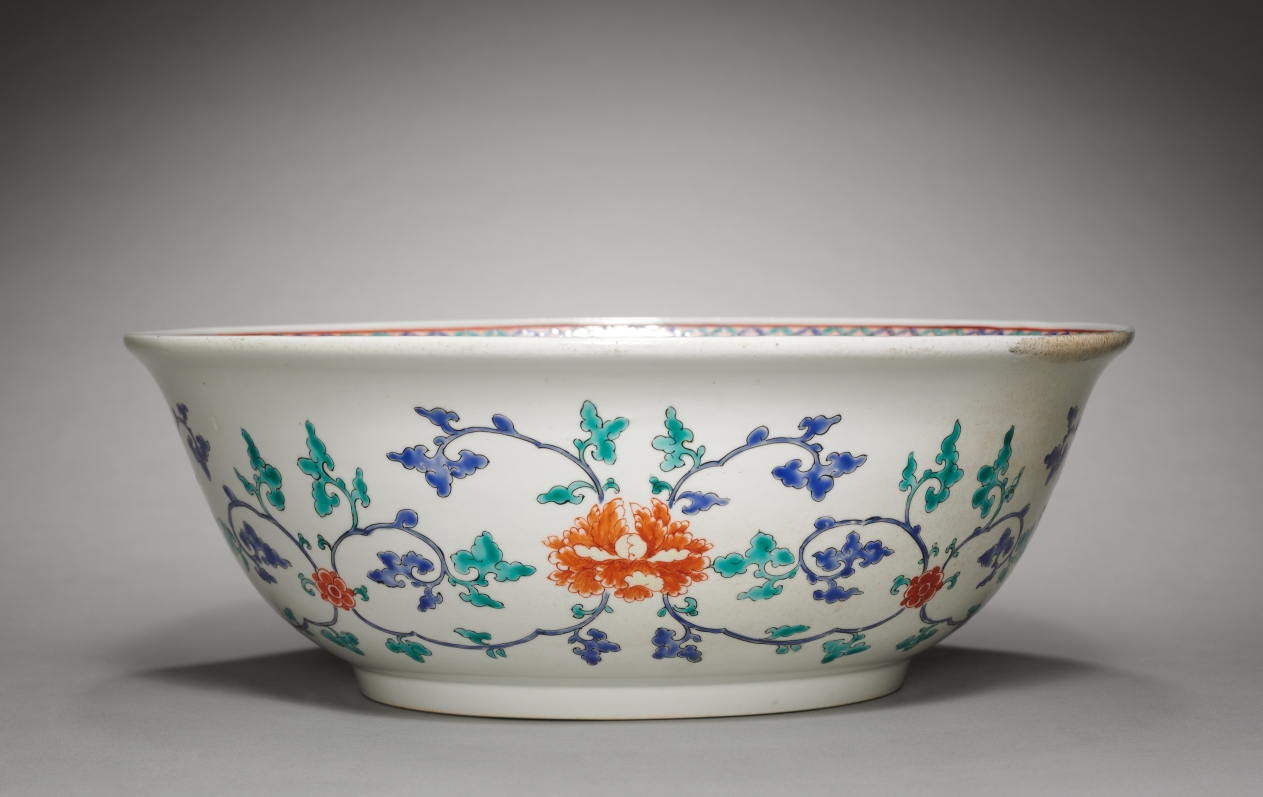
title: Bowl: Kakiemon Ware (1 of 2)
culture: Japan, Edo period (1615–1868)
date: late 1600s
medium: Imari ware porcelain with overglaze enamel and gold decoration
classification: Ceramic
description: The Chinese style of decoration identifies this bowl as a product made for the markets in England, Holland, France, and Germany. Here, kakiemon potters rearranged the Chinese literati motifs of the plum, pine, and bamboo. Such kakiemon ware inspired domestic porcelain production in Europe in the 1700s and 1800s.